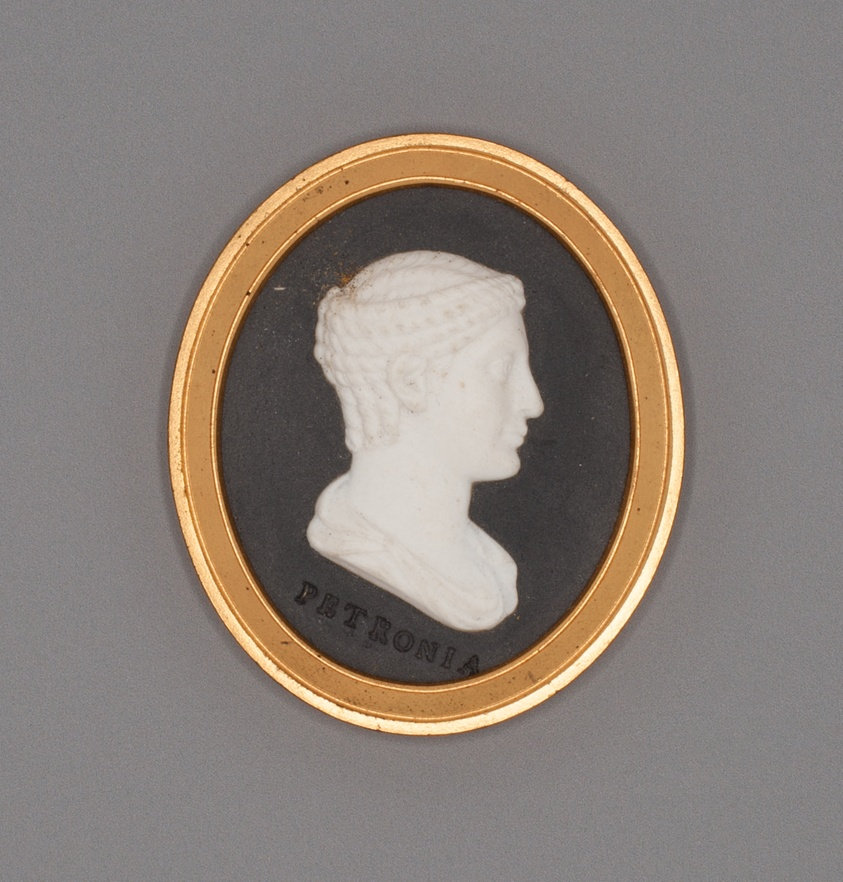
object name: Ceramics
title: Medallion with Petronia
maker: Wedgwood Manufactory (England, founded 1759)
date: Late 18th century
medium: Stoneware (jasperware)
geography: Burslem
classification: sculpture; stoneware; european decorative arts; ceramics